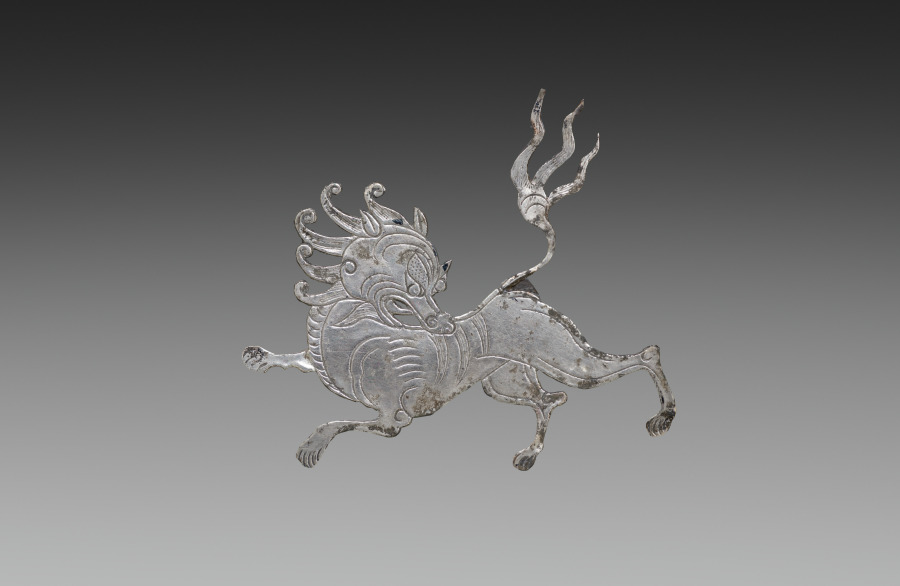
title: Inlay for a Mirror or Box: shih-shih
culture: China, Tang dynasty (618-907) - Song dynasty (960-1279)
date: c. 900–1000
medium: beaten silver with chased details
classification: Metalwork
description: The p'ing-t'o technique of inlaying gold and silver foil on lacquer produced luxurious articles of elegance and fragility. These stray silver inlays were originally mounted on a mirror back or a cosmetic box whose lacquered surface has disintegrated. They combine auspicious symbols of Indian and Chinese origin--human-headed birds whose melodies filled the Buddhist paradise, and bird-riding deities who inhabited the skies of Taoist mythology. Like these imaginary beings, the lions were probably paired in a radial design; at least one has been lost.